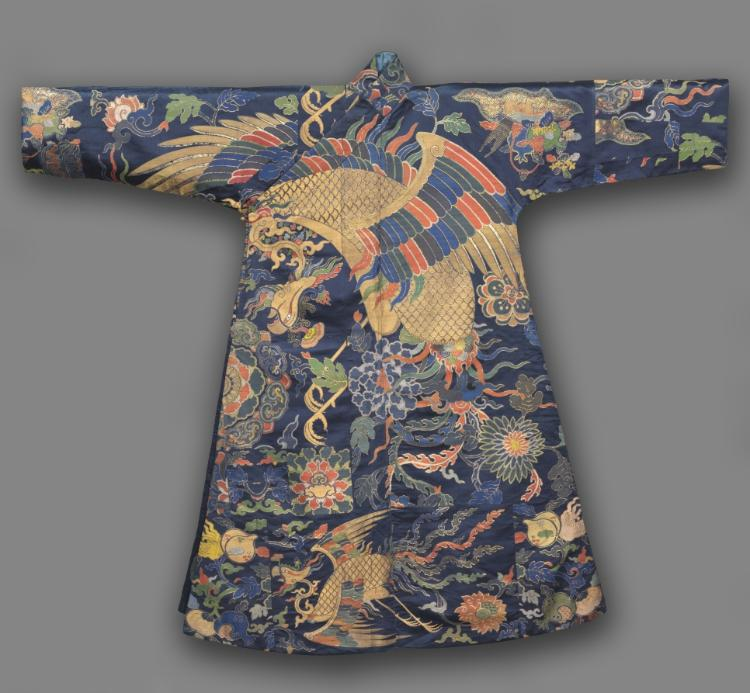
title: Tibetan Man's Robe, Chuba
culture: China, Qing dynasty (1644-1911), Kangxi period (1662-1772)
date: late 1600s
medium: Silk, gilt-metal thread of two kinds: satin weave with supplementary weft patterning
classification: Garment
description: This magnificent robe for a Tibetan lama or an aristocrat was originally a Chinese imperial wall hanging. Tibetan tailors cut it into 60 separate units, reassembling the fabric for a completely new and bold design. The wearer of such a garment must have impressed bystanders by his striking appearance. What you see here is the robe’s back side. Textiles played an important role in Chinese diplomacy with foreign governments. Diplomatic gifts of silk served to pacify border populations and to maintain balanced power relationships. Over centuries the Chinese court endeavored to keep a stable relationship with powerful Tibetan Buddhists. During the Qing dynasty (1644–1911) the Chinese court began to send gifts of court garments and furnishings to Tibet where they were altered to create Tibetan-style robes.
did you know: Large, splendid gold-thread phoenixes have pride of place on the front and back of the robe, complemented by two smaller but equally resplendent phoenixes below.